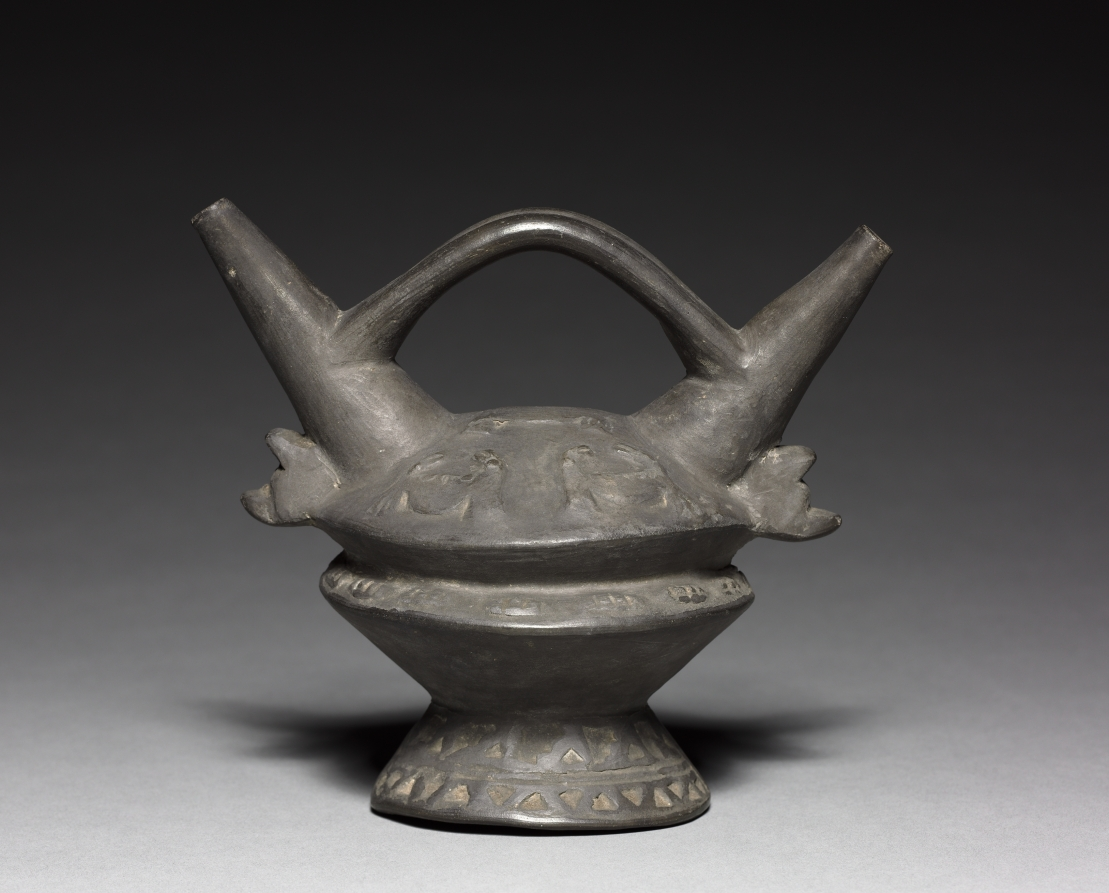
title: Vessel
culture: Peru, Chimú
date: 1300–1400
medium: black ware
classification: Ceramic